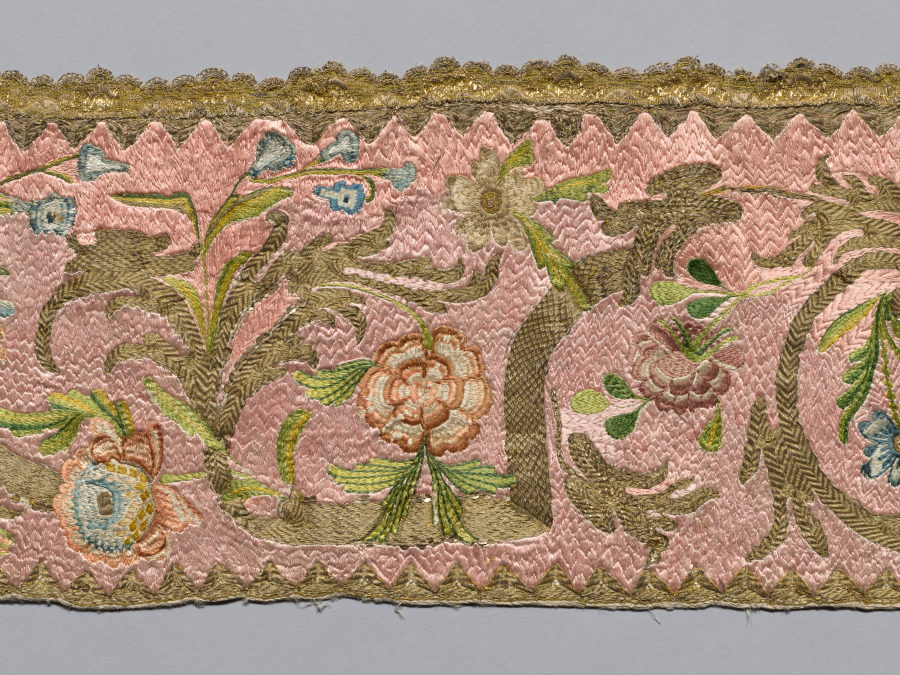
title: Embroidered Strip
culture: Italy, 18th century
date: 1700s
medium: embroidery, silk and gold thread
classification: Embroidery